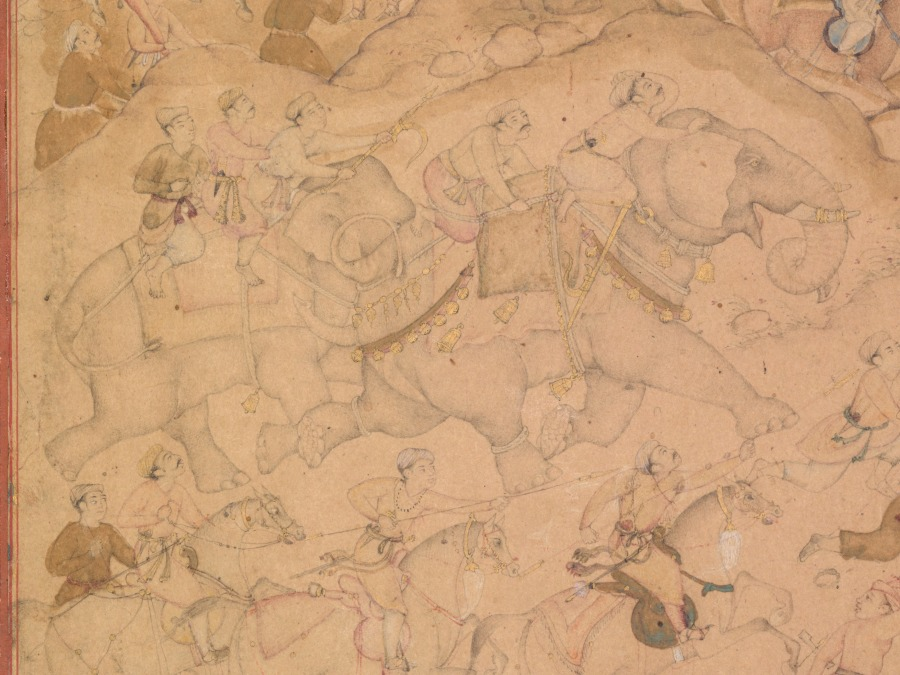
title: Akbar supervising the capture of wild elephants at Malwa in 1564, painting 90 from an Akbar-nama (Book of Akbar) of Abu’l Fazl (Indian 1551–1602)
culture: India, Mughal court, made for Emperor Akbar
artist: attributed to Farukh Chela (Indian)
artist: or Govardhan (Indian, active c.1596–1645)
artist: or Dhanraj (Indian)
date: c. 1602–3; borders added c. 1700s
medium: ink with use of colors and gold on paper, mounted on an album page with borders of gold-decorated buff and blue paper (verso); calligraphy by Faqir Ali (recto)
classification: Painting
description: This painting is from a biography of Akbar made shortly before his death. It depicts a historical event from early in his reign when he encountered a herd of wild elephants and captured many of them for his royal stables. Akbar rides horseback in the upper left, directing his men as two trained elephants give chase in the foreground. The Mughals caught wild elephants by chasing them with tame elephants, then tethering them together and feeding them their favorite food. European prints had made their way into Akbar’s collection, and they provided the visual source for distant cityscapes, rolling hills, and less densely colored paintings.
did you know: A yak-tail flywhisk, ancient Indian symbol of sovereignty, is held up for Akbar.